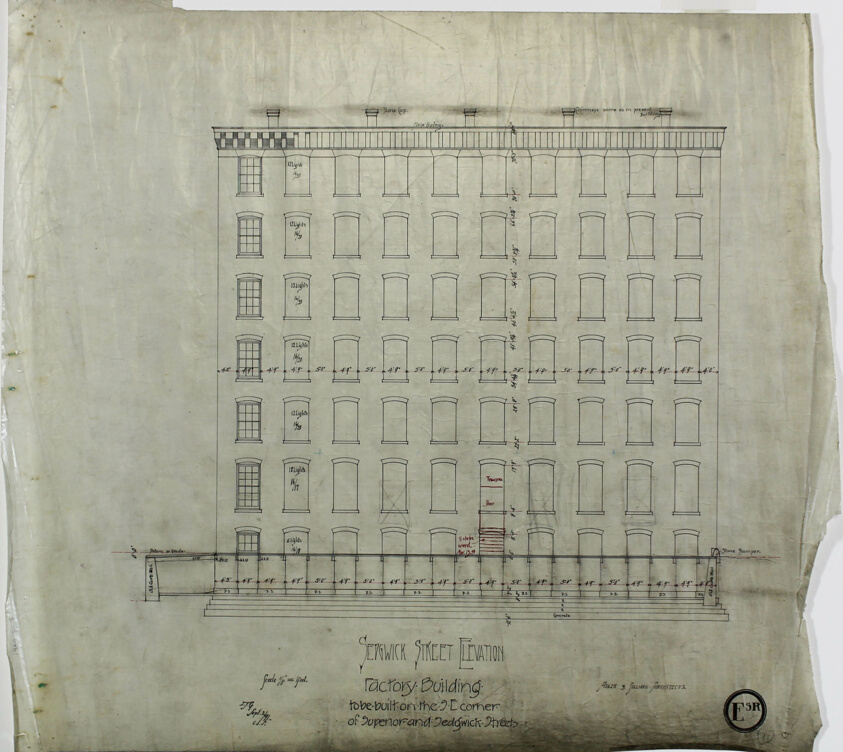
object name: Architectural Drawing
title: Brunswick Balke and Collender Company Factory Building, Chicago, Illinois, Elevation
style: 19th century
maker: Adler & Sullivan, Architects (American, 1883–1895); William F. Curth (American, 19th cen.); Irving J. Gill (American, 1870–1936); Charles J. Self (American, 19th cen.)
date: 1891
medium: Black and red ink on linen with pencil notes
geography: United States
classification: architectural working drawing; architectural drawing; architecture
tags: office buildings, architecture, Chicago